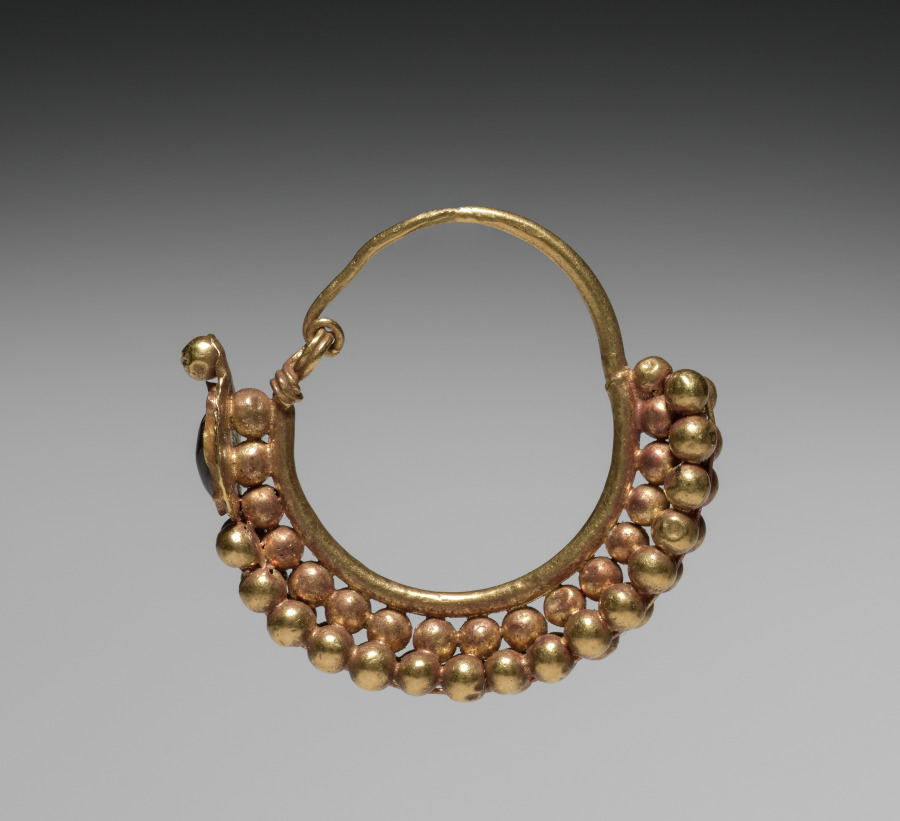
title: Earring (one of a pair)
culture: Syria, Roman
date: 100 BCE–100 CE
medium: gold and garnet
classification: Jewelry